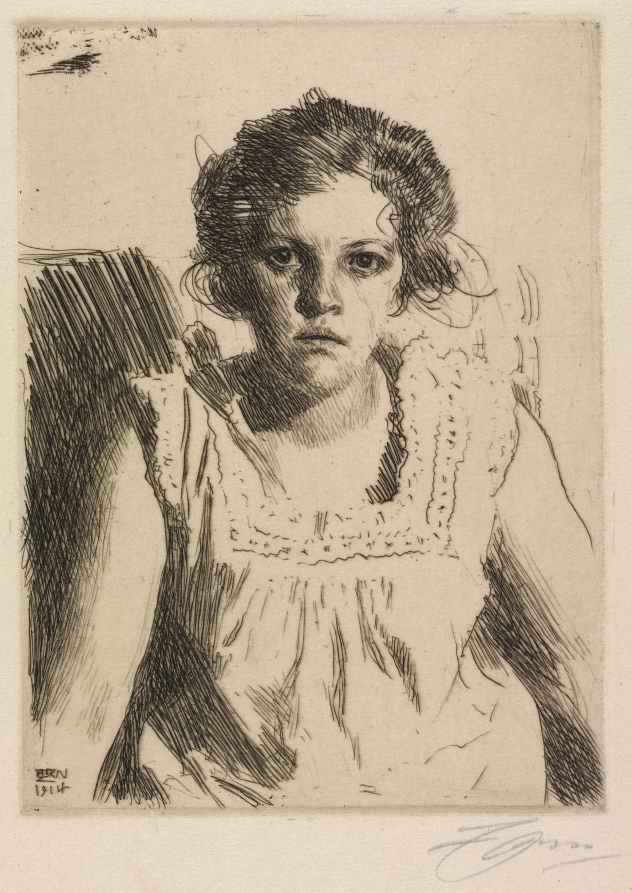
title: Frida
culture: Sweden, 20th century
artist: Anders Zorn (Swedish, 1860–1920)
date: 1914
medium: etching and drypoint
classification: Print